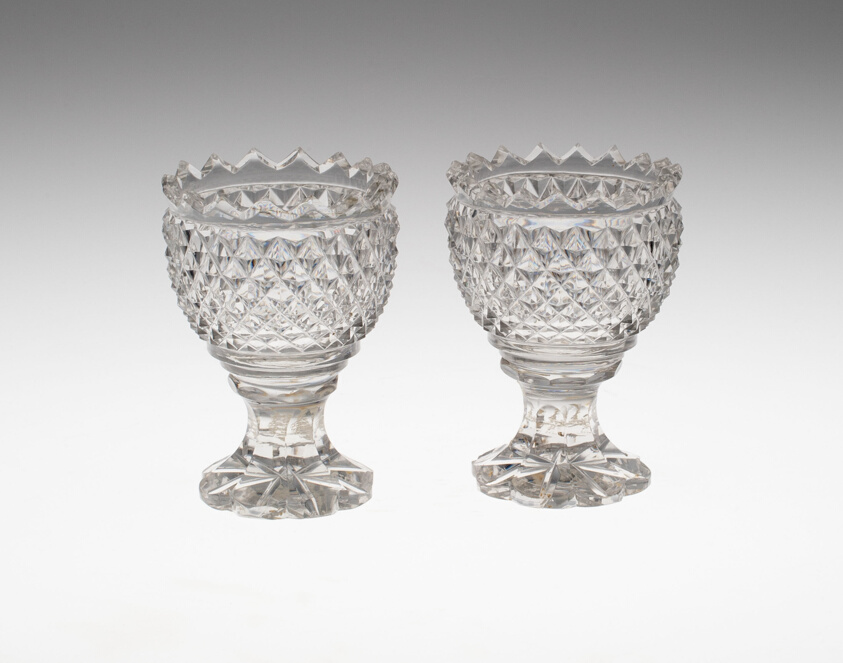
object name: Glass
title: Two Salts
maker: England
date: c. 1800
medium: Glass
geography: England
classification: saltcellar; glass; european decorative arts